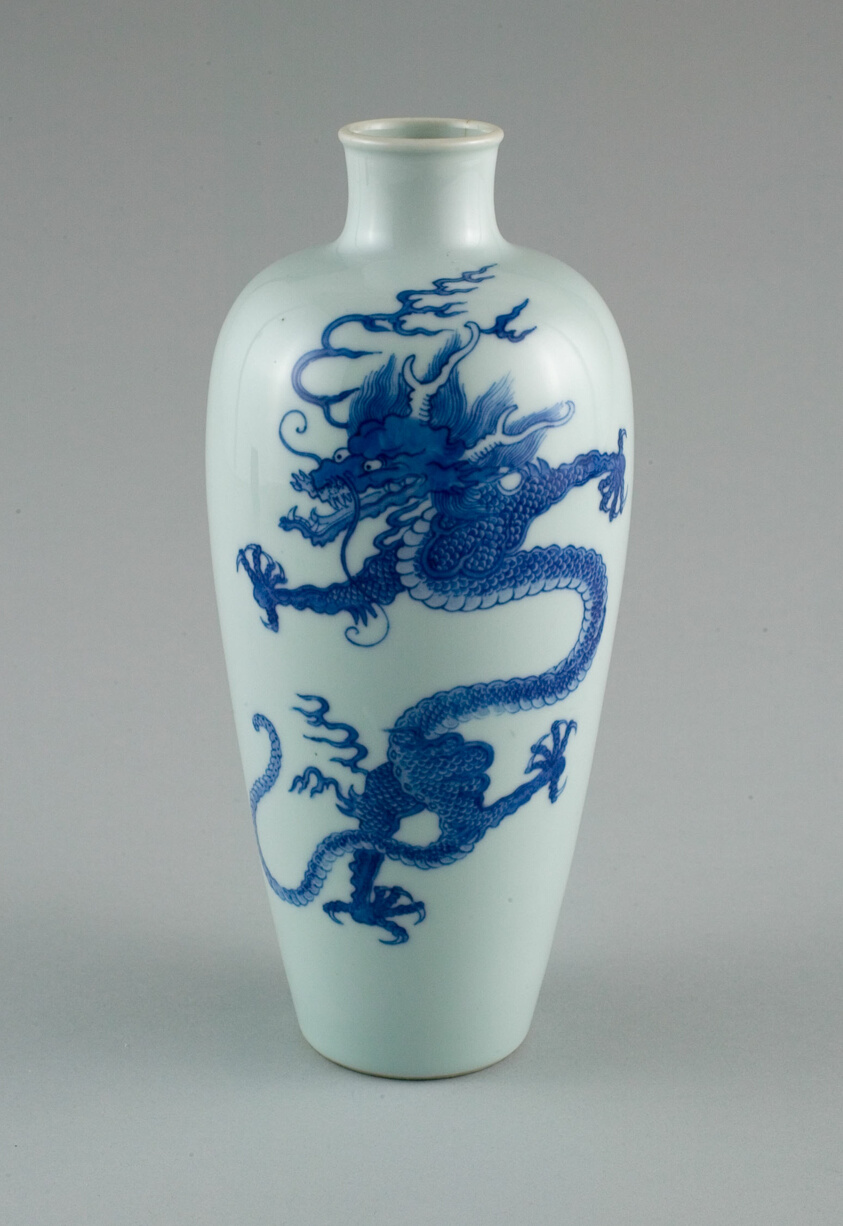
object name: Vessel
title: Vase with Dragons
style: Chinese (culture or style)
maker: China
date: Qing dynasty (1644–1911), Kangxi period (1662–1722)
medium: Porcelain painted in underglaze blue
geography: China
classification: vase; porcelain; vessel; asian art; ceramics